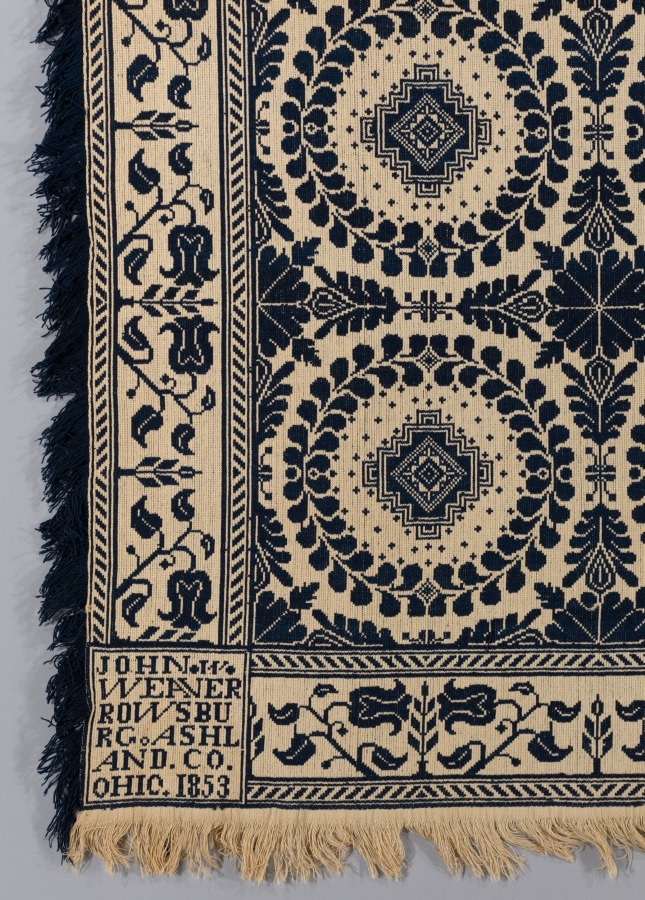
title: Coverlet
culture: America, Ohio, Ashland County, Rowsburg, 19th century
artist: John W. Weaver (American)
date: 1853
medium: compound weave: wool and cotton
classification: Textile